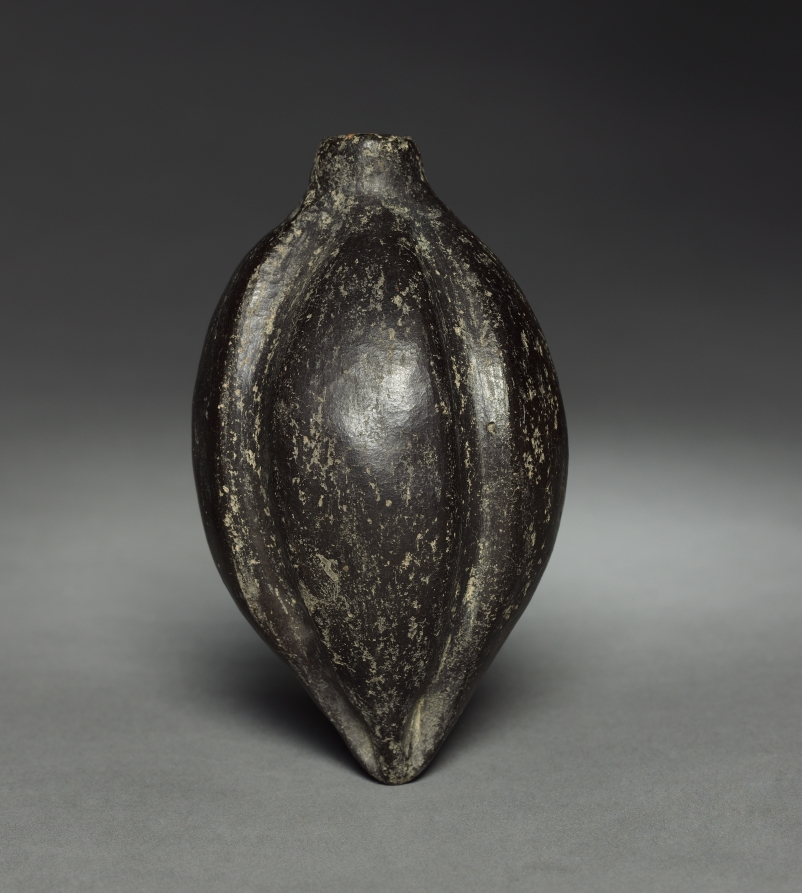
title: Fruit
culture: Colombia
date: before 1921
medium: pottery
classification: Ceramic